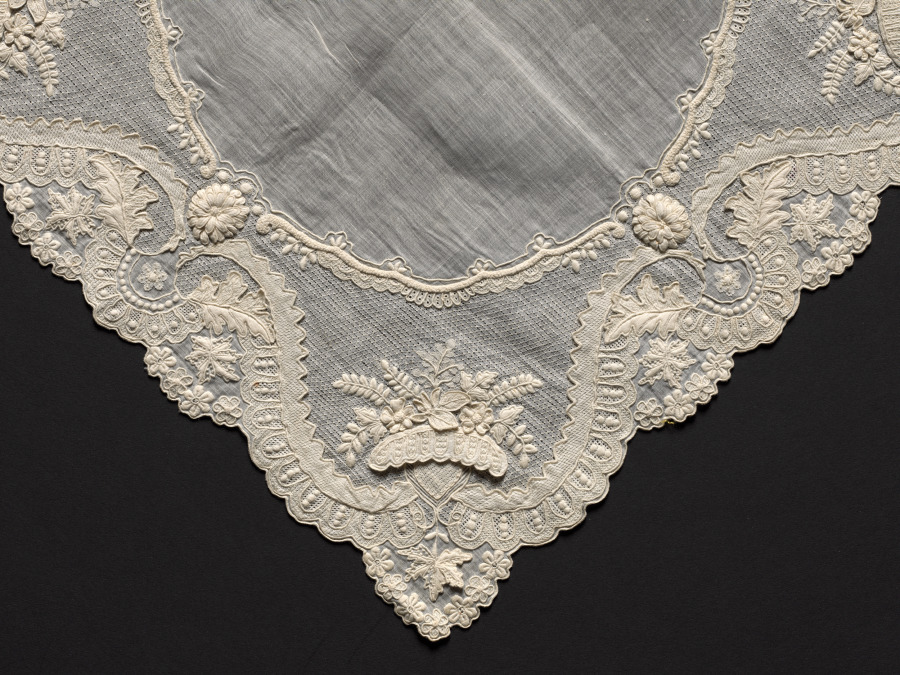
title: Embroidered Handkerchief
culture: Italy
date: 1800s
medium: Plain weave linen: needle lace (drawnwork) border and raised work embroidery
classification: Embroidery